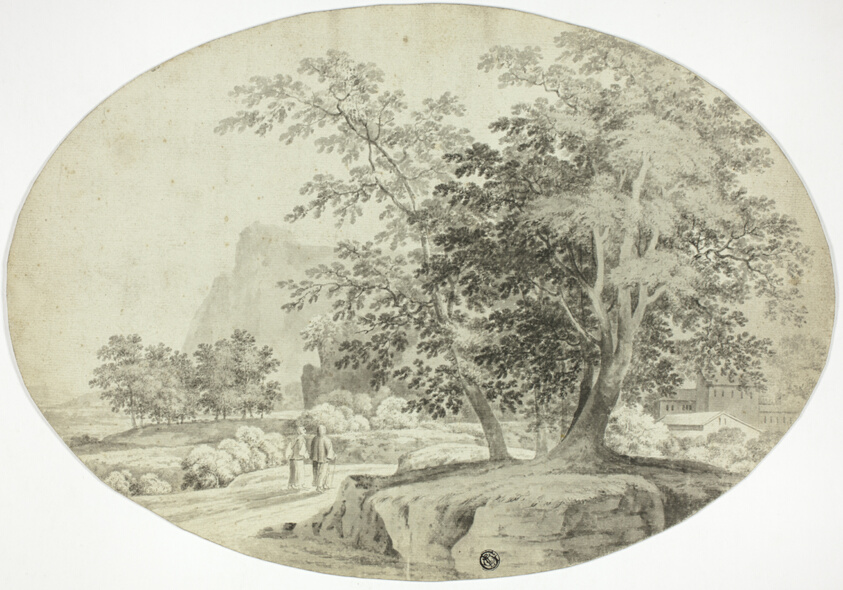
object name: Drawing and Watercolor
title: Two Pilgrims on a Wooded Road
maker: Unknown Artist; European, 18th century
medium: Brush and pen and black and gray wash on oval shaped pale gray laid paper, laid down on ivory laid card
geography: Europe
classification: brush and wash; paper; drawings (visual works); prints and drawing